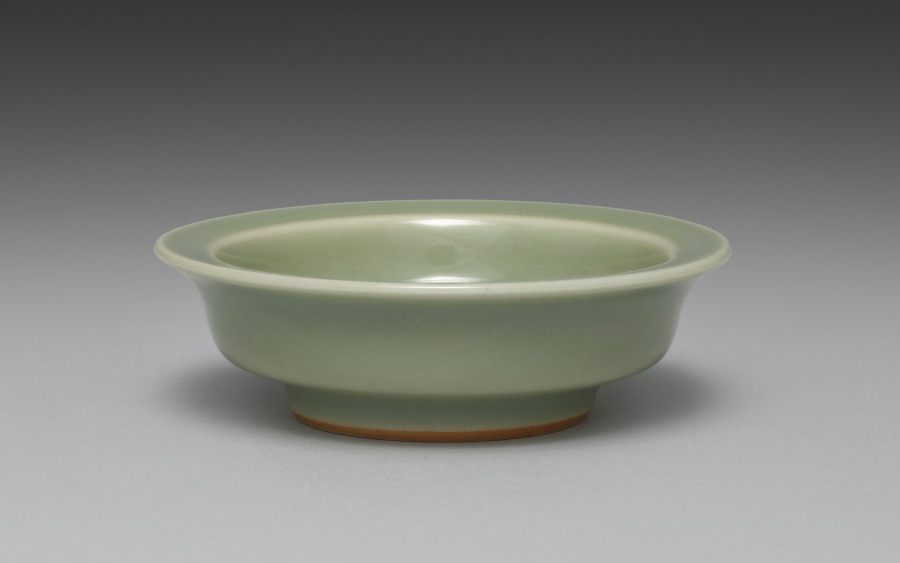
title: Saucer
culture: Japan, Meiji period (1868–1912)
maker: Seifū Yohei III (Japanese, 1851–1914)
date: 1893–1914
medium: One from a set of ten dishes; porcelain with green glaze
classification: Ceramic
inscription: 清風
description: Yohei III’s main output for his sophisticated clientele was in the form of tea sets and dining sets. He created a range of dishes in green glazes. He often produced in pairs, sets of five, or sets of ten. For this set of ten small dishes in a simple, round form that emphasizes the glaze above all, the box lid designates the piece as seiji, or green-glazed porcelain, using a general term for the extensive palette of green glazes often called celadon in English. The box lid further identifies the dishes themselves as tōchō, literally “bean-sized saucers,” a size that makes them suitable for dipping sauces.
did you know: The ten dishes in this set are stored in stacks of five in a two-compartment box.